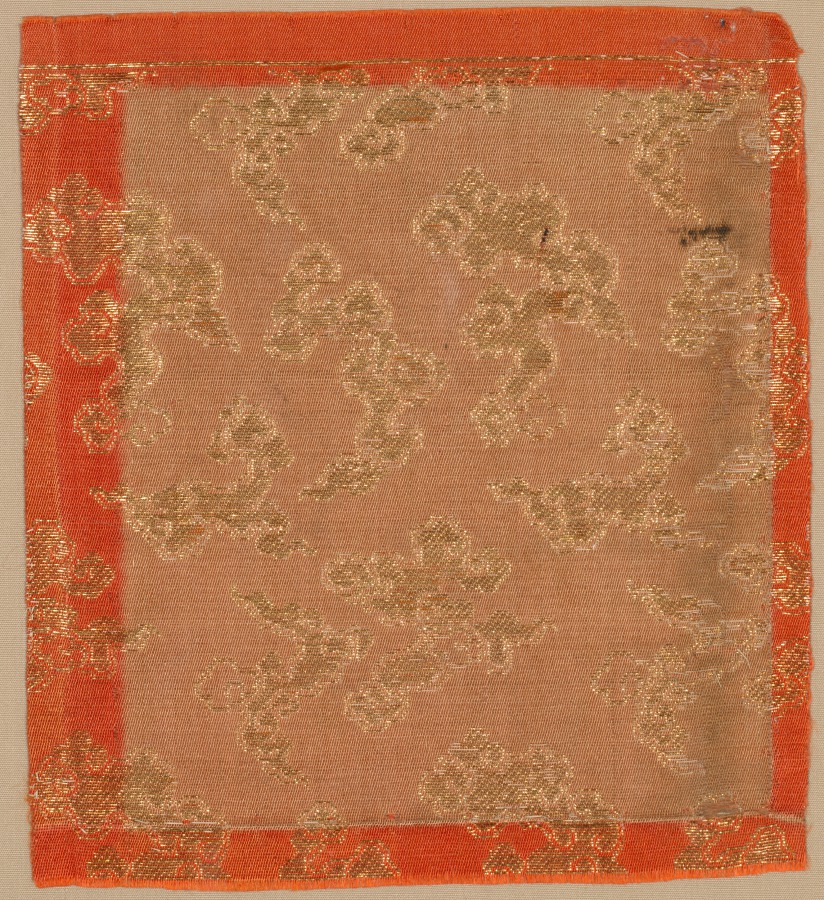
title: Textile Fragment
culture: Japan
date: 1800s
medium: silk, metallic thread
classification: Textile